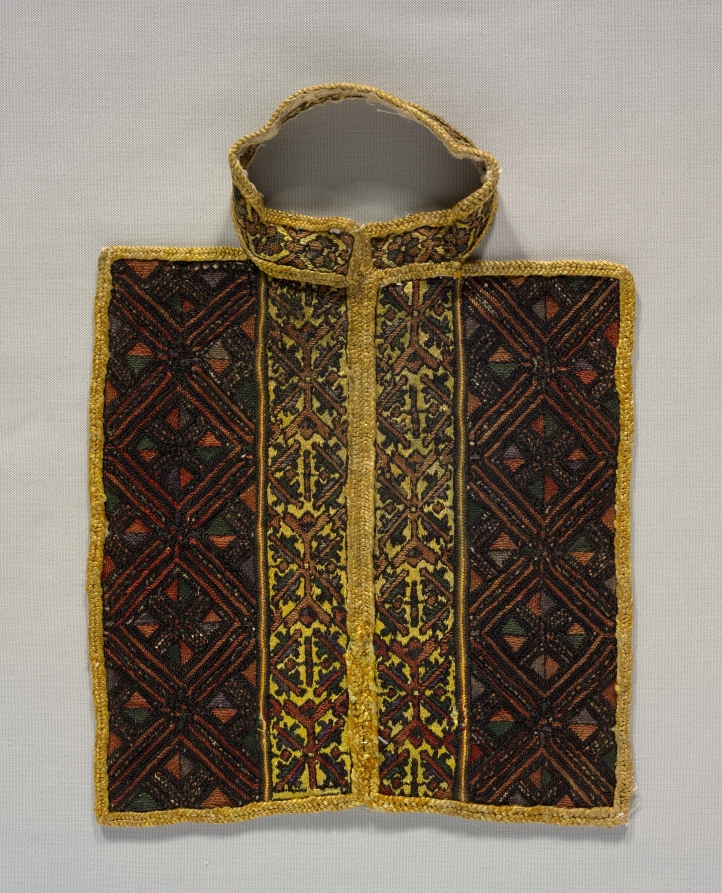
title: Blouse Front with Collar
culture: Dalmatia, 19th century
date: 19th century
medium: cottonembroidery on linen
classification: Embroidery